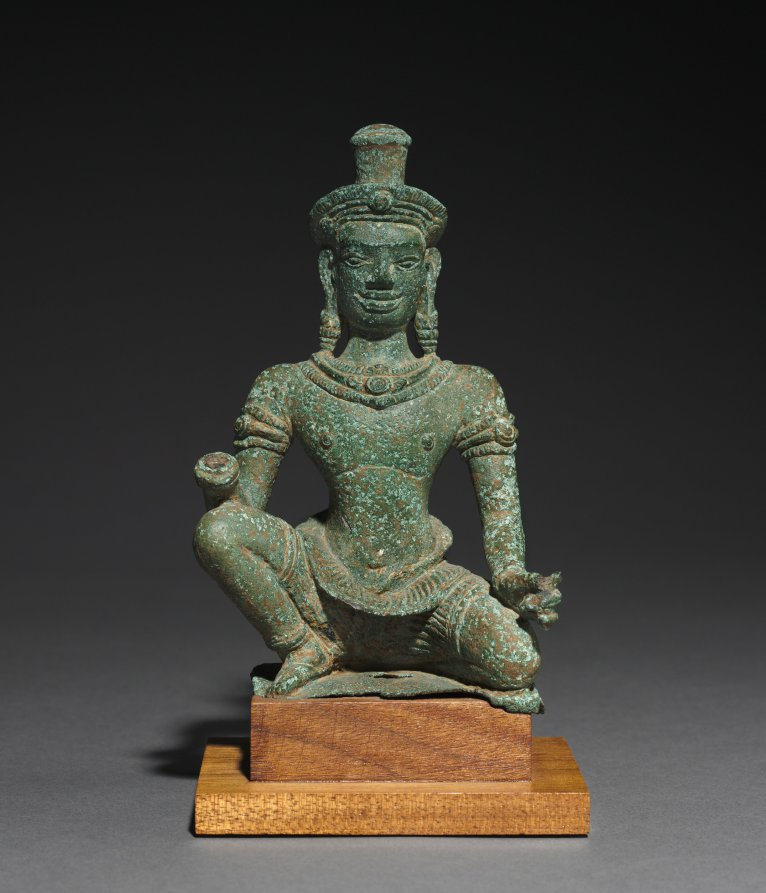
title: Kneeling Worshipper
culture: Cambodia, Angkor Wat style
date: 1100s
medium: bronze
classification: Sculpture